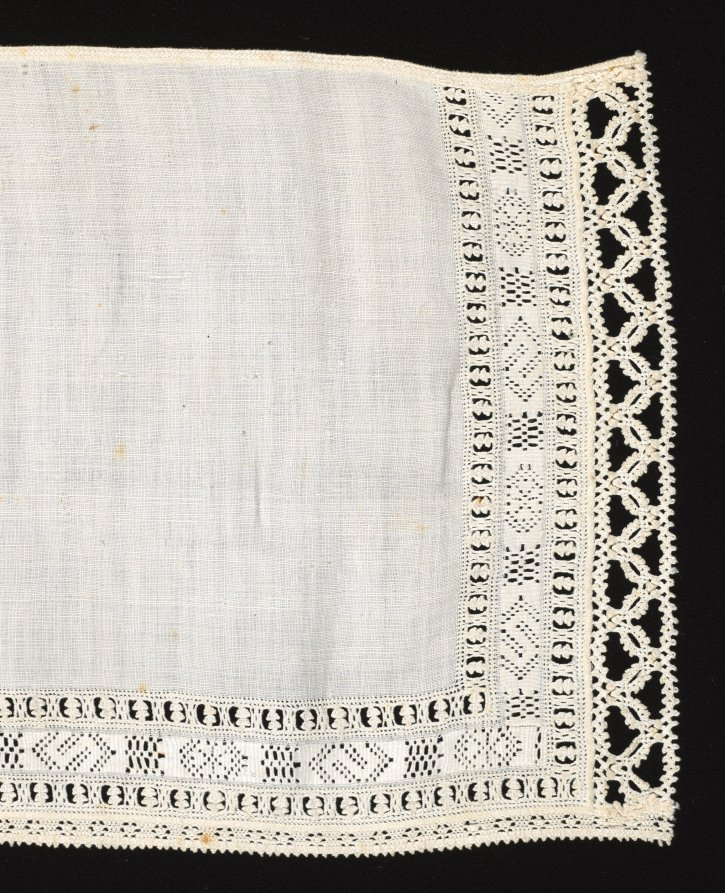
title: Swaddling Band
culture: Italy, Venice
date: 1540–60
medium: Linen: needle lace (drawnwork) and bobbin lace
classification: Lace